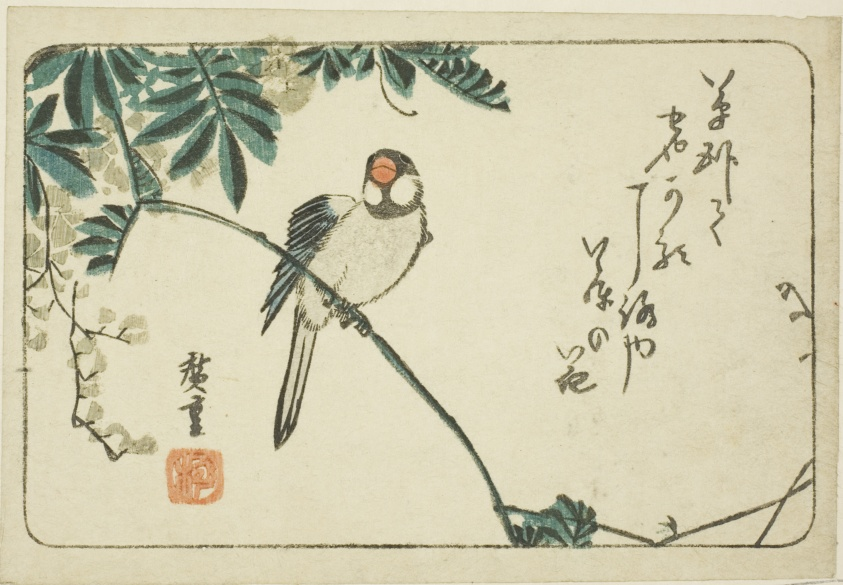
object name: Print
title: Sparrow and wisteria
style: Japanese (culture or style)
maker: Utagawa Hiroshige 歌川 広重; Japanese, 1797-1858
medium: Color woodblock print; yotsugiriban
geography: Japan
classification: woodblock print; print; asian art